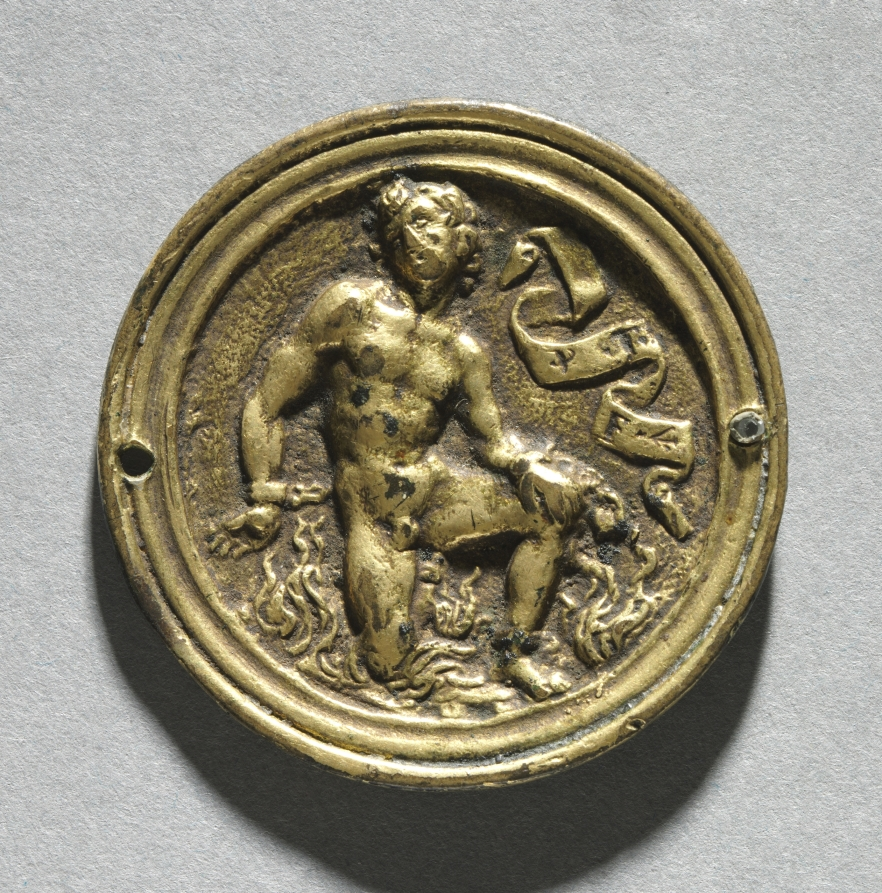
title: Allegory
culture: possibly Northern Italy, 16th century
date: possibly early 1500s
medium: gilt bronze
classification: Sculpture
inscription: on right, a twisted banderole inscribed: I T E.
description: This object might have graced a man’s hat or the handle of a sword. The allegory has yet to be deciphered, but the heroic male nude chained in flames probably addresses masculine virtues of strength or stoicism.